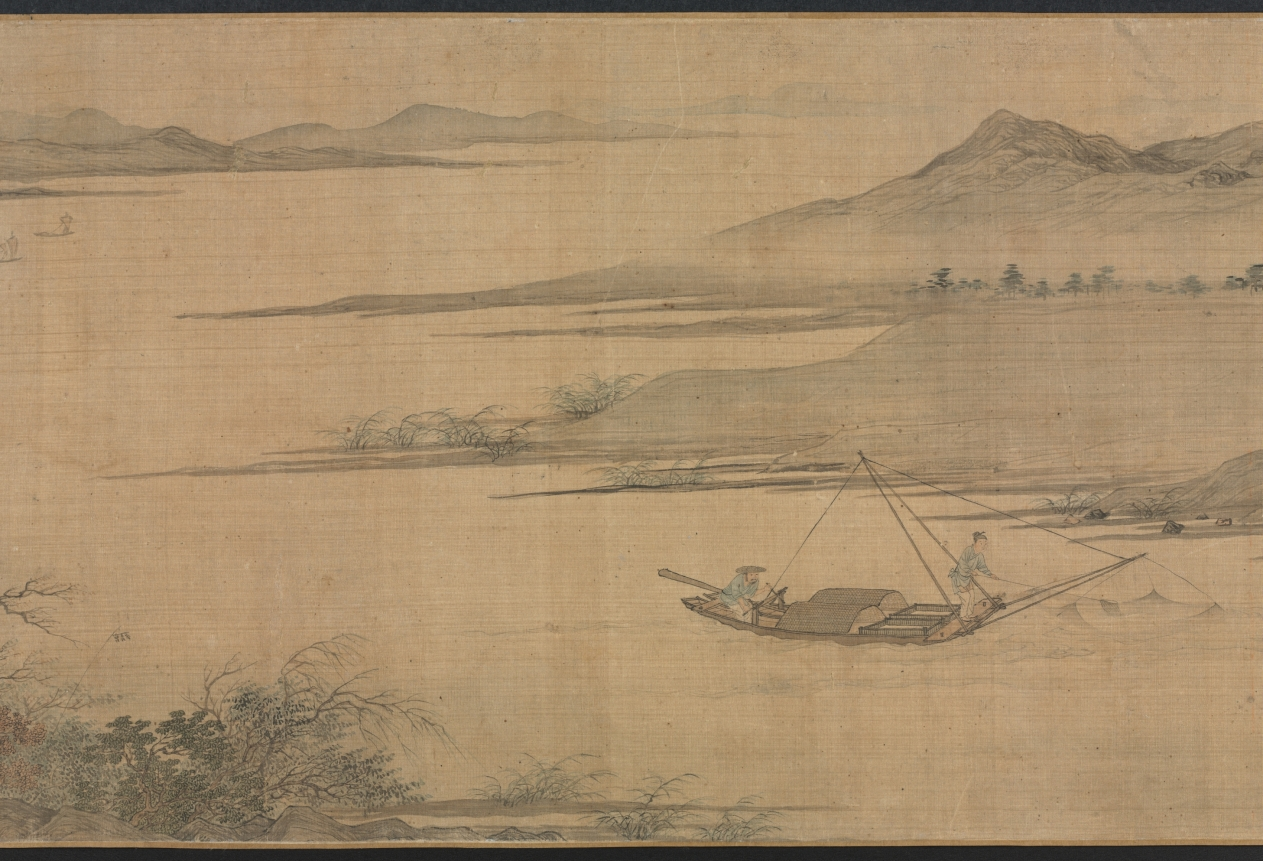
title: Scholar-Hermits in the Autumn Mountains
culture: China, Ming dynasty (1368–1644)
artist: Tang Yin (Chinese, 1470–1523)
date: 1500–1510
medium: handscroll, ink and light color on silk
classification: Painting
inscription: Artist's signature and 2 seals at end of scroll: Tang Yin [seals] T'ang Po-hu; T'ang Tzu'wei t'u-shu.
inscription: Title on frontispiece by Li Cho-kung (dates unknown).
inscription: 1 colophon and 11 additional seals: 1 colophon dated 1915 of Wu Tso-hsi (19th-20th c.); 2 seals of Gao Qifeng 高奇峰 (1889–1933); 5 seals of C. C. Wang 王季遷 (1907–2003); 4 seals unidentified.